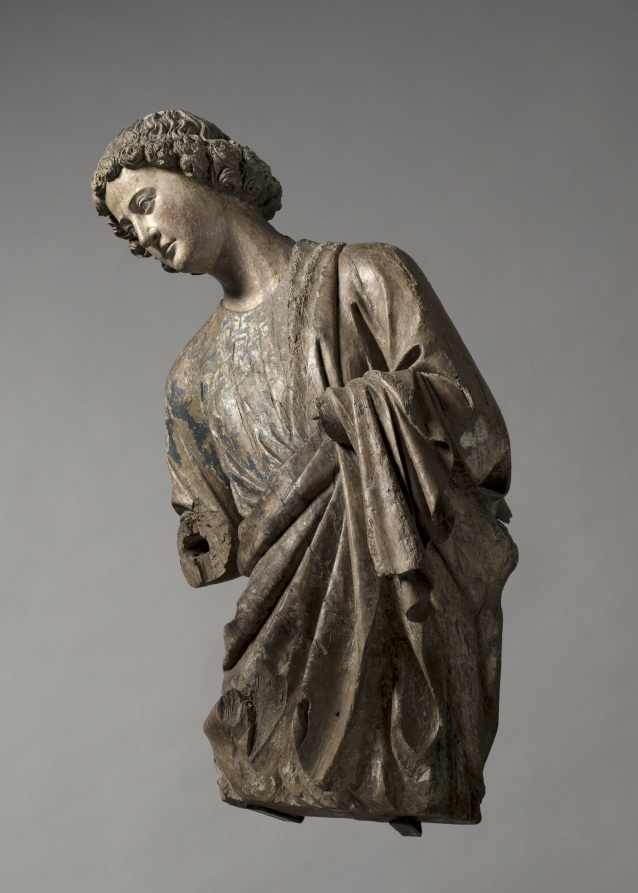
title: Angel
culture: France, vicinity of Reims, 13th century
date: c. 1250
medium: walnut with traces of gilding and polychromy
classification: Sculpture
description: Surviving in fragmentary condition, this pair of angels lacks lower arms, hands, wings, and attributes. Their original paint and gilding, now almost entirely lost, once rendered their garments a rich brocade and their hair a luxuriant gold. Nonetheless, in their graceful poses and sublime faces—which may portray tragic interest, anguish, or deep concern—their original delicacy and power are still evident. They embody the monumental style of 13th-century High Gothic cathedral sculpture in France. Their style specifically suggests they were carved in or around Reims, possibly by sculptors associated with the cathedral there. Their original placement is unknown, but they may have flanked an altar on columns.